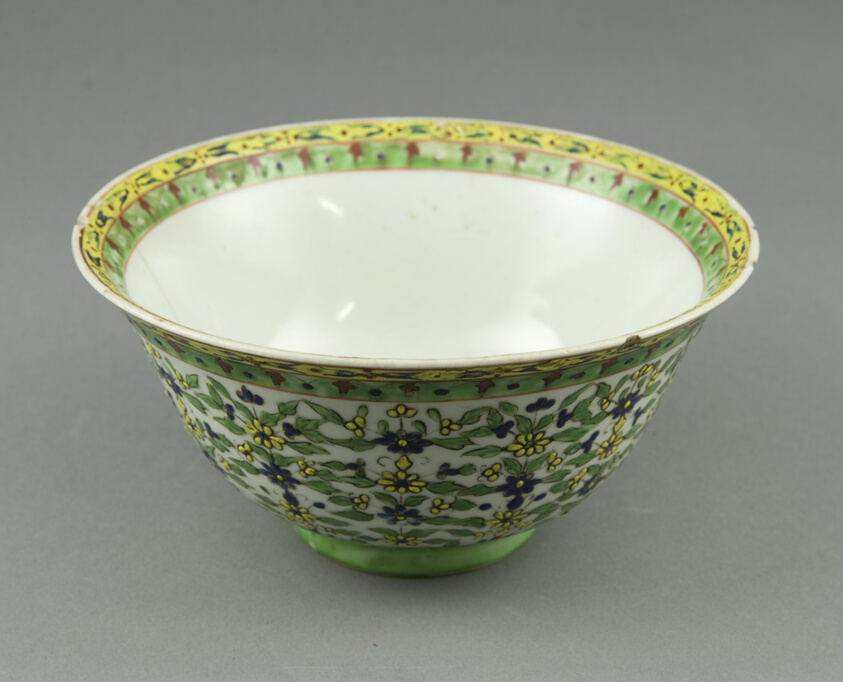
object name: Decorative Arts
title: Bencharong (Five-Colored) Ware, Bowl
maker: China, for the Thai Market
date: 19th century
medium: Porcelain painted in overglaze polychrome enamels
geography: China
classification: porcelain; asian art; ceramics; decorative arts